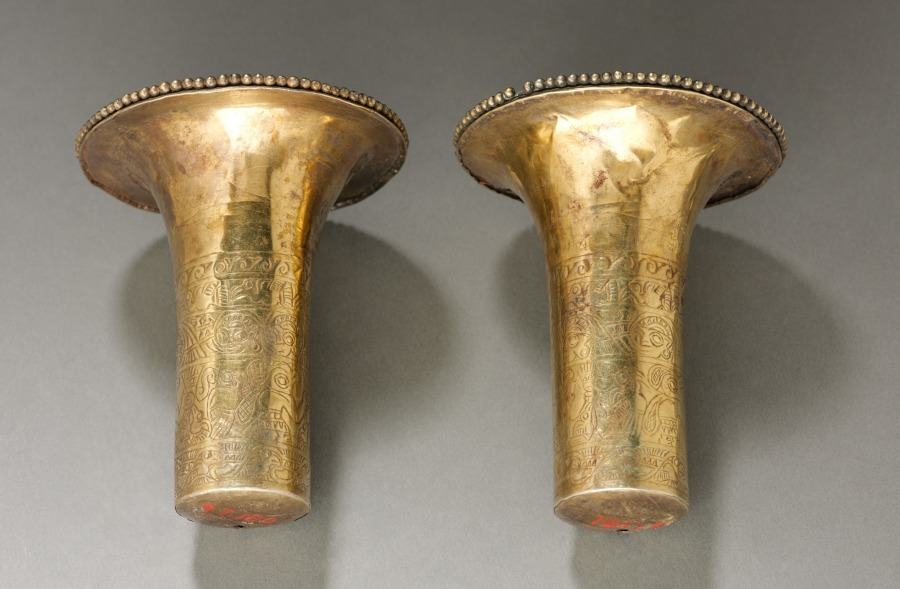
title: Pair of Ear Flares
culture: Peru, North Coast, Chimú style (900-1470)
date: 900–1470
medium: hammered gold alloy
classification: Metalwork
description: North Coast ear ornaments typically have a long shaft that balanced the weight of the glorious frontal. This pair illustrates Chimú interest in the sea, which had great economic and religious importance. On the shafts are bands of seabirds and waves, and a similar pattern edges the frontals, which were altered in modern times. Originally solid disks, the frontals' centers were cut out and a dotted band was added to the rim.